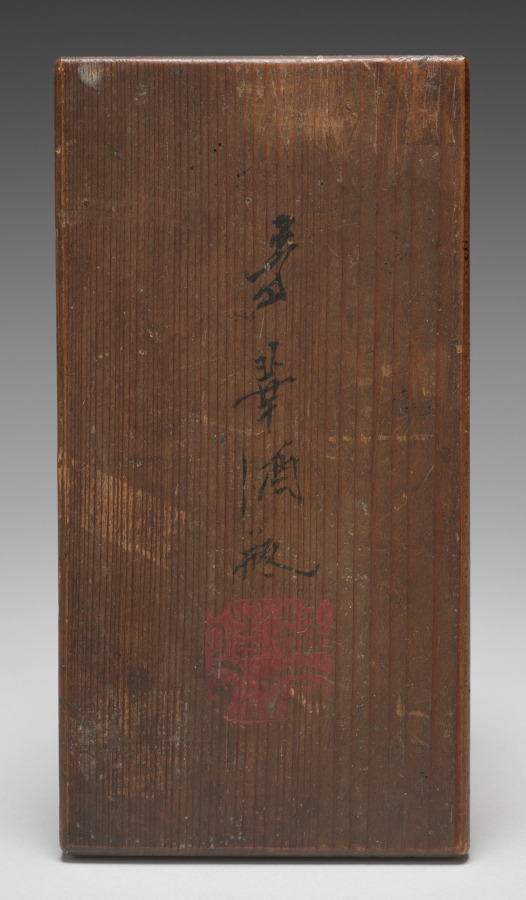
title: Sake Pourers with Bamboo and Bellflowers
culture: Japan, Edo period (1615–1868)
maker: attributed to Seifū Yohei I (Japanese, 1801–1861)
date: c. 1844–57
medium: pair of sake pourers; stoneware with white slip, underglaze blue and gold repair (kintsugi) (Kyoto ware)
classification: Ceramic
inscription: The storage box for the pair of vessels is inscribed and impressed with seals.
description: This pair of sake pourers adorned with with bamboo and bellflowers is attributed to the founder of the Seifū Studio, Seifū Yohei I (1801–1861). Yohei I, the lineage founder, was born to the Yasuda family in the city of Kanazawa, which faces the Sea of Japan. His home province of Kaga (in present-day Ishikawa Prefecture) produced its own ceramics, known as Kutani ware, but for his training as a potter, Yohei I chose Kyoto, which produced the more technically advanced porcelain ware. He moved to Kyoto around the 1820s and became apprenticed to Nin’ami Dohachi, a leading potter in the city. He later struck out on his own, and it is likely that his teacher gave him the name Seifu Yohei. His works include many exquisitely painted copies of Chinese porcelain, and he also produced stoneware with overglaze color enamels that emulated works in the style of Ogata Kenzan (1663–1743) at which his teacher excelled.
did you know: The two pourers are stored together in a bespoke box, which is inscribed and impressed with red seals.